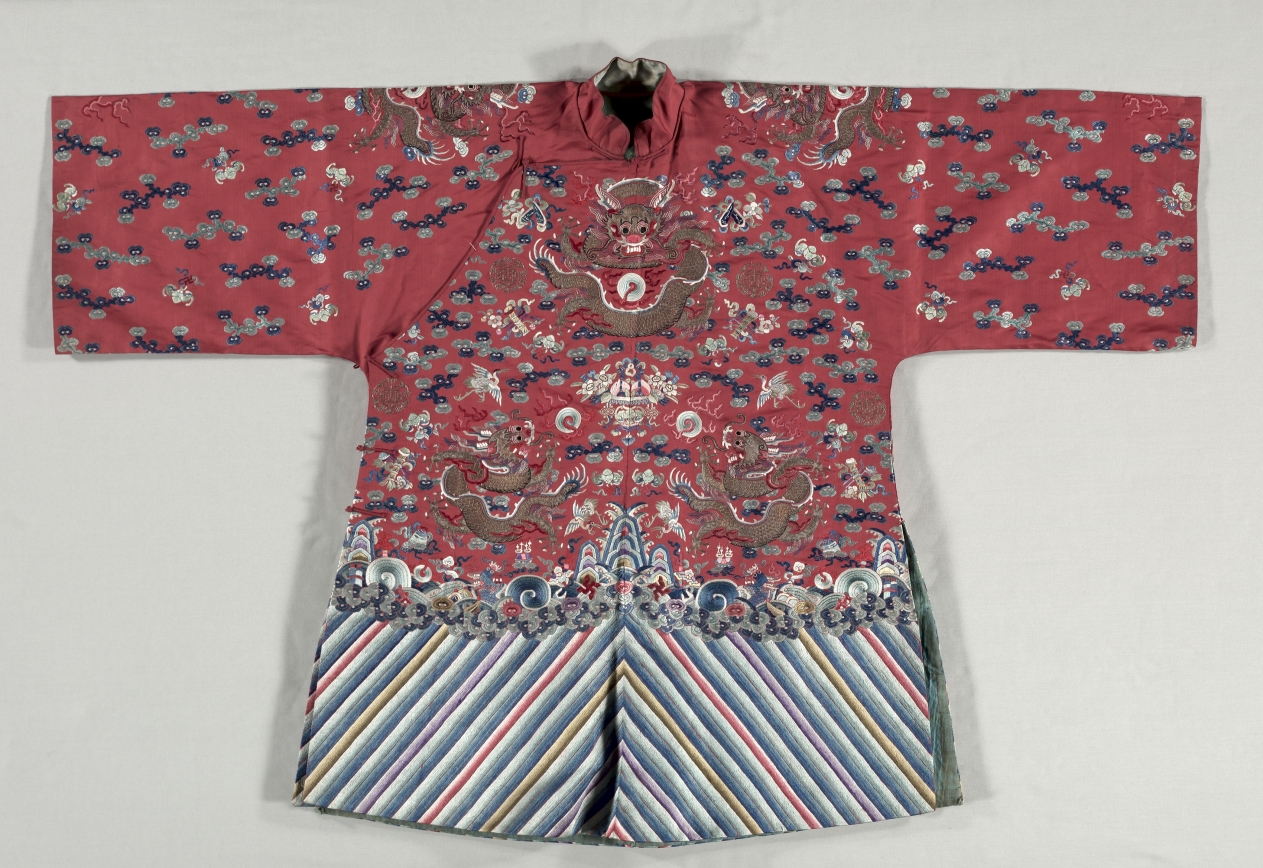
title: Woman's Bridal Dress, Dragon Jacket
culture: China, Qing dynasty (1644-1911)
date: 1800s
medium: Silk, gilt-metal thread; embroidery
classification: Garment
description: This three-piece bridal dress includes a dragon jacket, a pleated skirt, and a tabard, a short loose-fitting sleeveless vest. The ensemble reveals the high rank of her husband; it did not fall under the scope of the Qing dynasty sumptuary laws. The woman's bridal trousseau contains a short red coat fastened on the side and wide sleeves. It is decorated with ten dragons and other cosmological motifs commonly found on court dress. The presence of ten dragons indicates that the wife's husband was a high-ranking official.